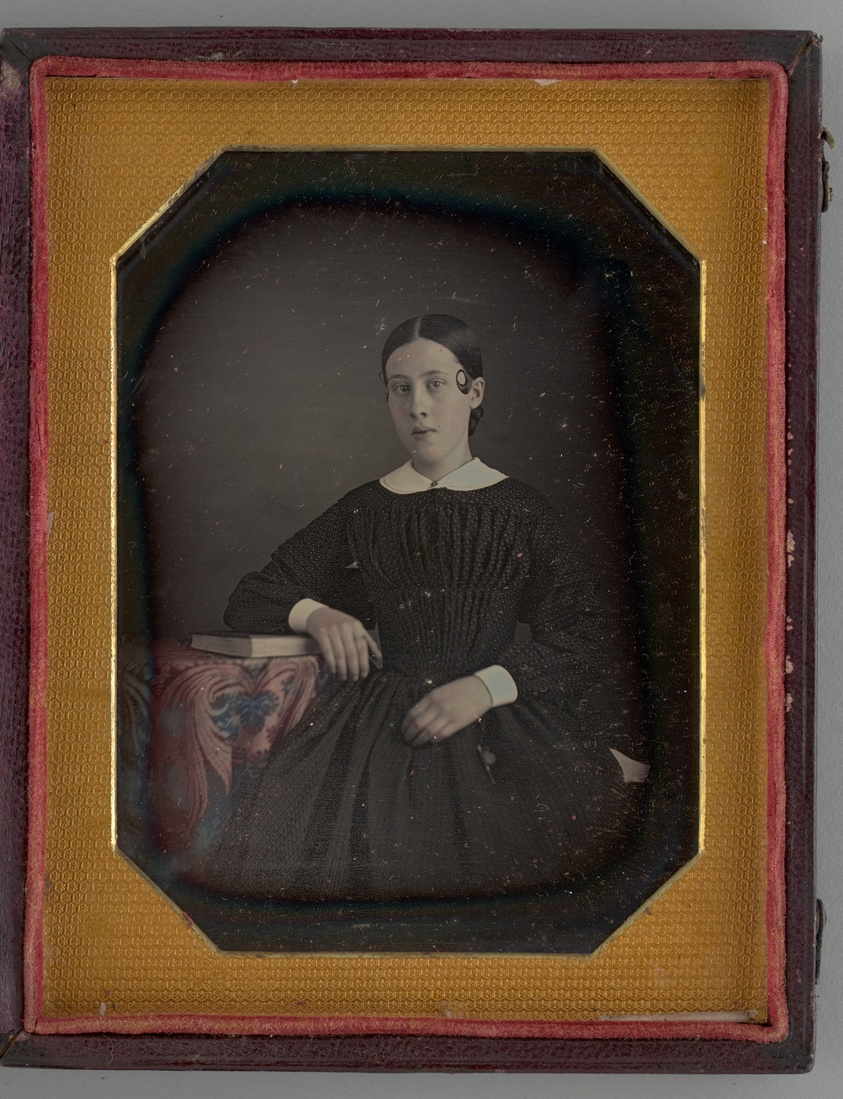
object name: Photograph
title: Untitled (Portrait of a Seated Woman)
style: 19th century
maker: John Plumbe; American, born Wales, 1809-1857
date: 1845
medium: Daguerreotype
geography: United States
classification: portrait; photograph; photographic process; photography; portrait; daguerreotype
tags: lundberg collection, portraits, portraits: female subject, photography, portrait